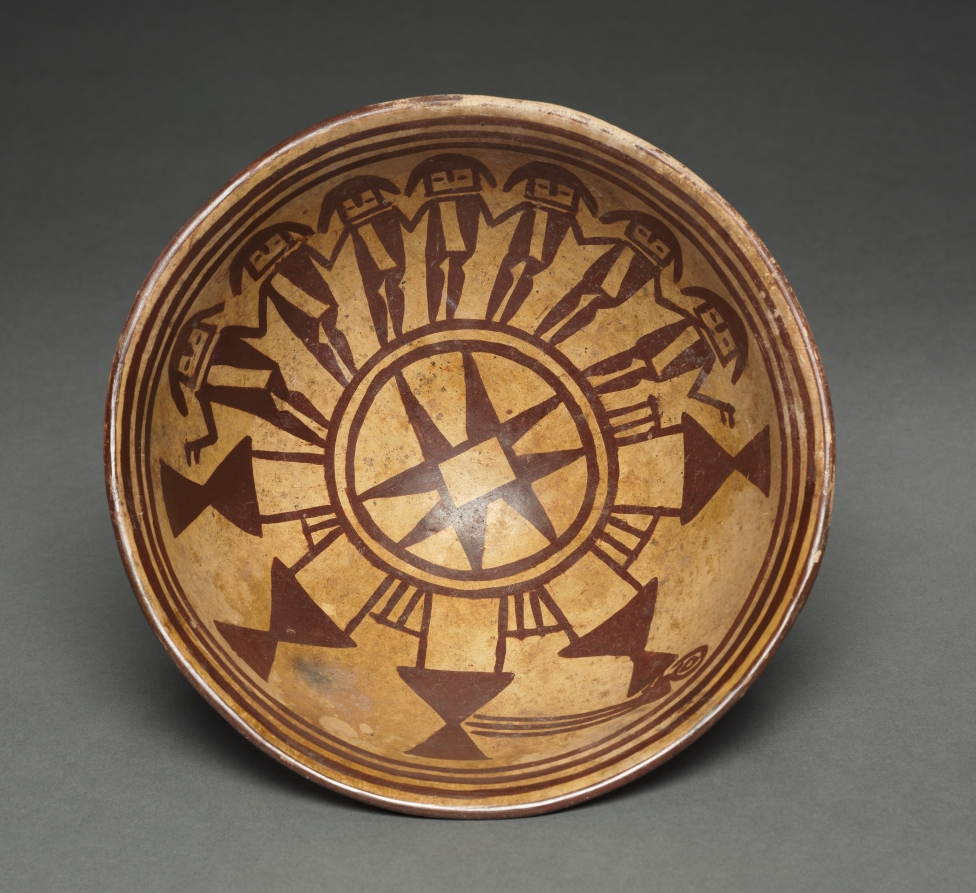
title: Bowl with Procession and Houses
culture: Colombia, Highland Nariño region,Tuza style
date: 1250–1550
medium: ceramic, slip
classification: Ceramic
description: In the Nariño region of southwestern Colombia, the dead were buried in shaft tombs, the most elaborate up to sixty feet deep and furnished with offerings such as these bowls. Colombian ceramics are not much studied and little can be said about their imagery, which reveals a keen interest in geometric abstraction. Depicted here are a row of figures with thatch-roofed huts, humans attacked by birds, and spiders.